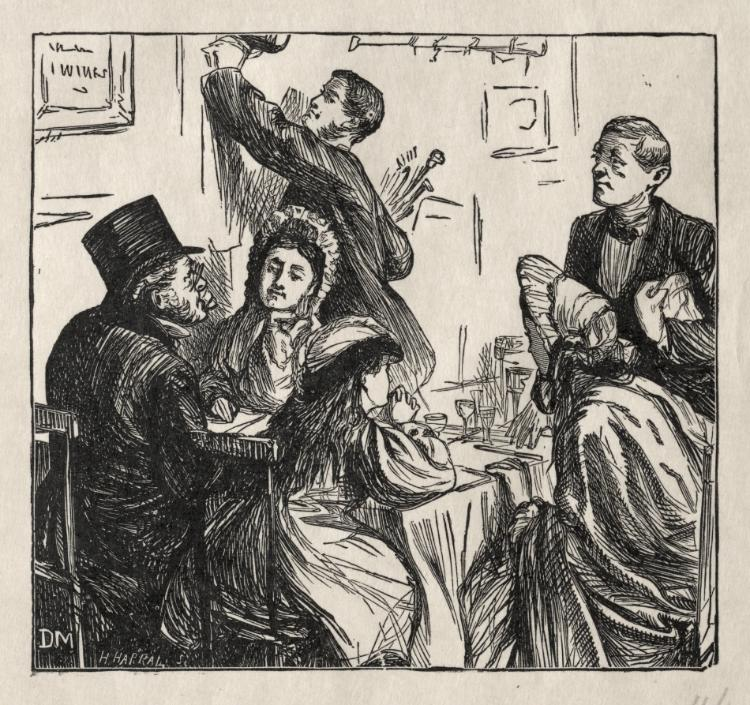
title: Refreshment - At the Great Exhibition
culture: England, 19th century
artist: George Louis Palmella Busson Du Maurier (British, 1834–1896)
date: 1862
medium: wood engraving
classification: Print